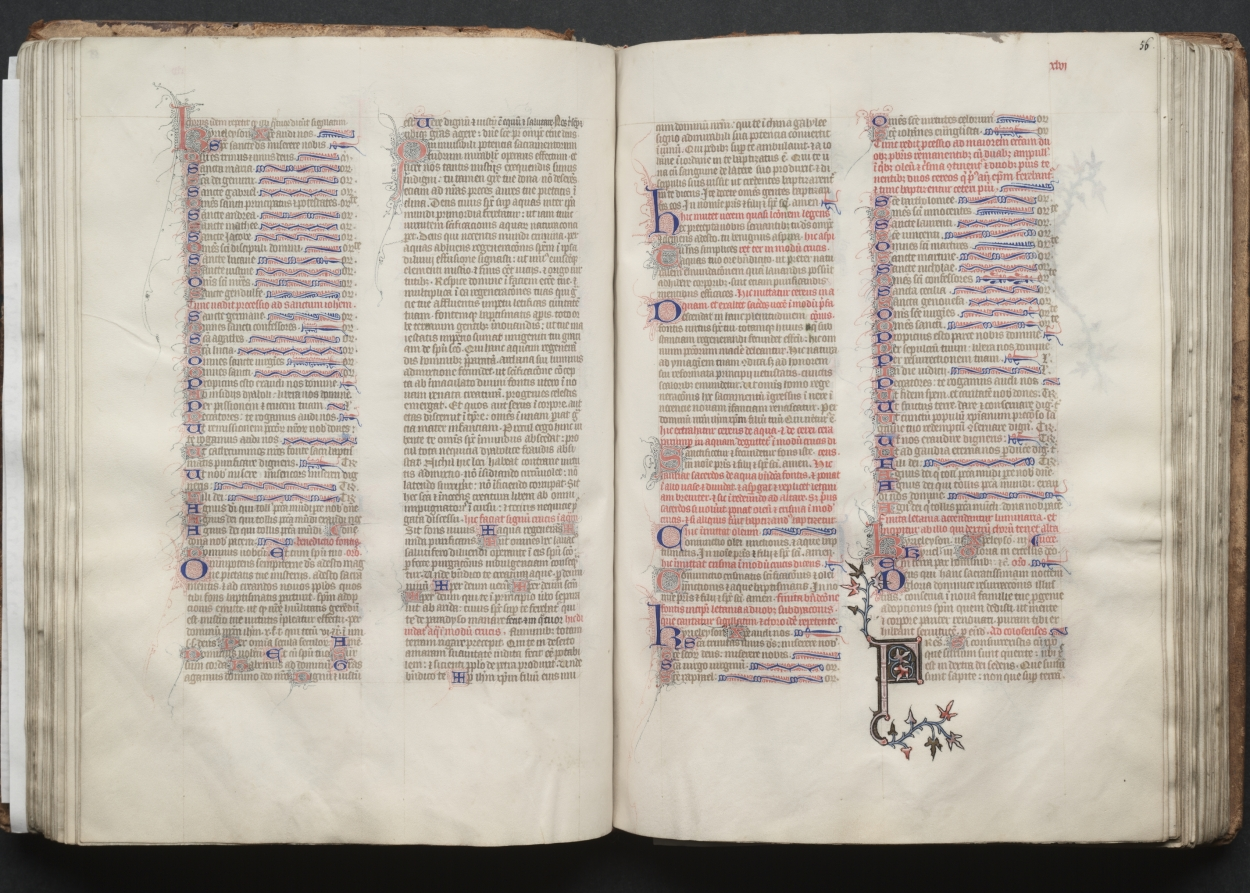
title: The Gotha Missal: Fol. 55v, Text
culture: France, Paris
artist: Master of the Boqueteaux (French)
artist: and Workshop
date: c. 1375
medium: ink, tempera, and gold on vellum; blind-tooled leather binding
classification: Bound Volume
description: The style and quality of this manuscript's decoration is typical of deluxe Parisian books made for aristocratic or royal patrons. Most of the book's decoration appears to be the work of the Master of the Boqueteaux, an artist active at the court of King Charles V (died 1380). His style was apparently shared by a number of book illuminators working in and around Paris. It is very possible that the Gotha Missal belonged to Charles V, but is not provable because the manuscript has no royal portraits and lacks a colophon. Given the book's magnificent decoration, however, it would seem that it was produced for a Valois prince, if not for the king himself. The manuscript receives its name from the German dukes of Gotha, its later owners.